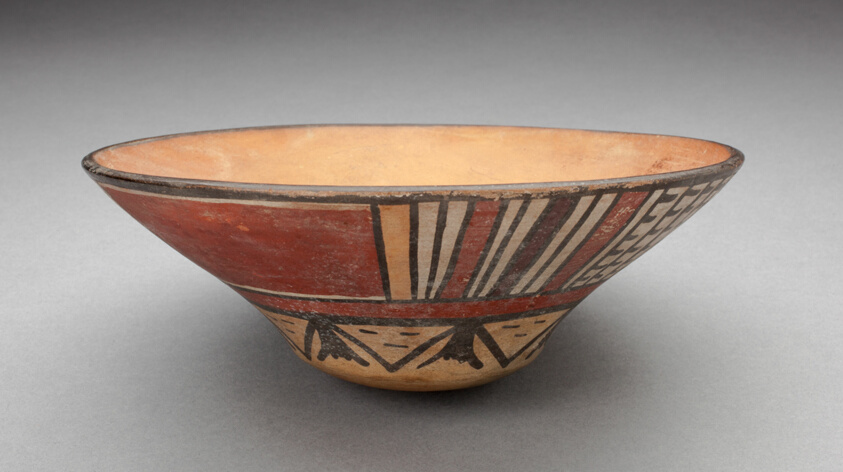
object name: Vessel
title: Wide Bowl with Geomeric Motifs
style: nazca, early intermediate period, Pre-Columbian, americas, Arts of the Americas, andean, andes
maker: Nazca; South coast, Peru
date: 180 BCE–500 CE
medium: Ceramic and pigment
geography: Nazca Valley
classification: bowl; earthenware; art of the americas; ceramics; vessel